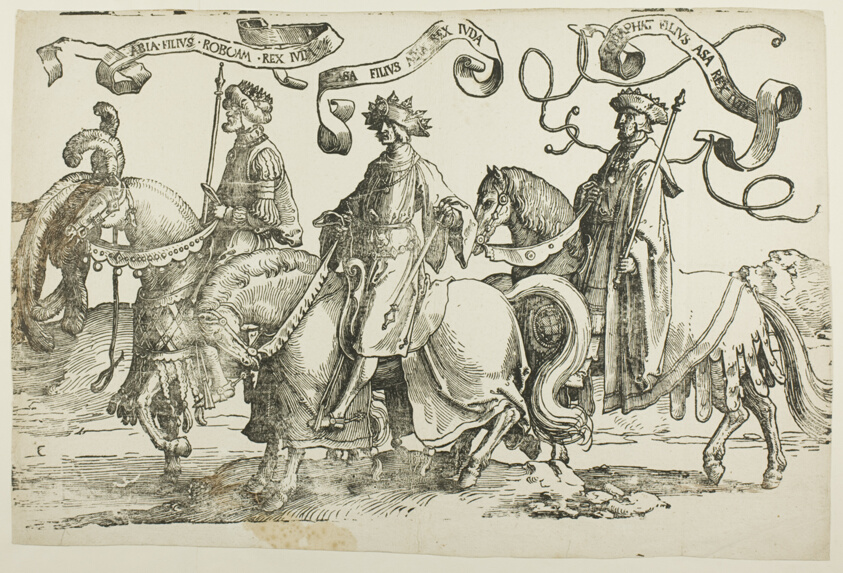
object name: Print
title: Abijah, Asa, Jehosafat, plate two, from The Twelve Kings of Israel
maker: Lucas van Leyden (Netherlandish, c. 1494-1533)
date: c. 1520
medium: Woodcut in black with touches of pen and brown ink on buff laid paper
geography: Netherlands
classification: woodcut; print; prints and drawing